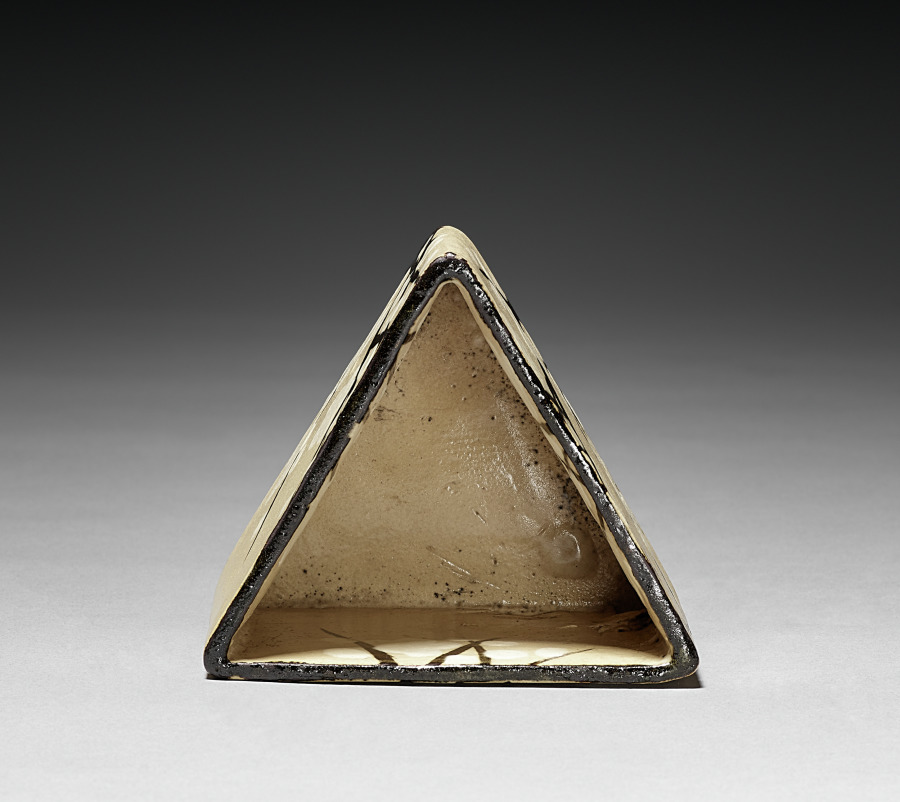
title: One of Five Serving Bowls (Mukozuke) with Prunus Design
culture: Japan, Edo period (1615–1868)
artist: school of Ogata Kenzan (Japanese, 1663–1743)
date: 1700s-1800s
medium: Kyoto Ware: stoneware with underglaze iron oxide and slip decoration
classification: Ceramic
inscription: signature on bottom, 3 characters in brown iron.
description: Note the rough, tan, clay bodies of these bowls with their deliberate irregularities. The design of branches was first painted in a black iron oxide, then the blossoms and buds in a white slip, followed by the application of a very thin transparent overglaze.